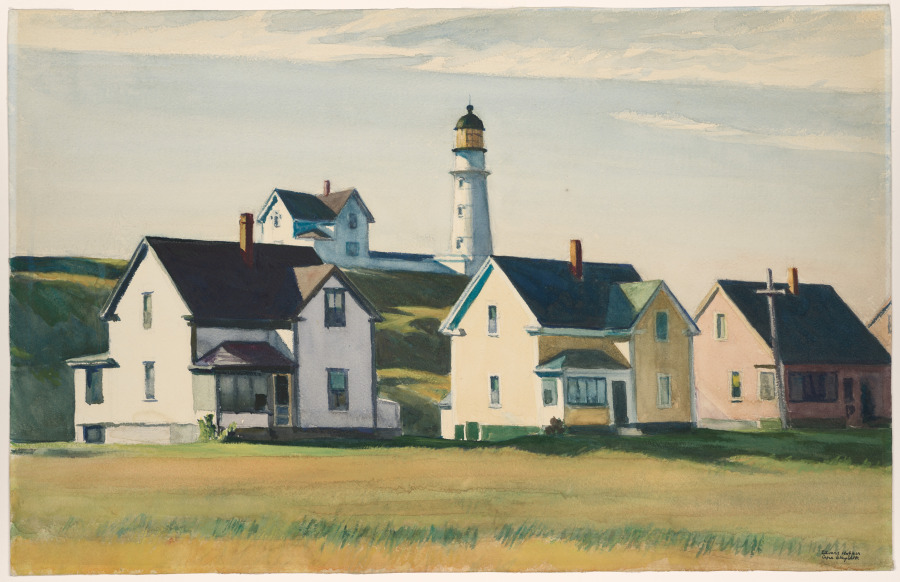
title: Lighthouse Village (also known as Cape Elizabeth)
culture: America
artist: Edward Hopper (American, 1882–1967)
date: 1929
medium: watercolor with gouache over graphite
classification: Drawing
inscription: signed, lower right, in black gouache: Edward Hopper / Cape Elizabeth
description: Edward Hopper made this watercolor during the last of several painting excursions that he took to Maine. He had painted the lighthouse at Cape Elizabeth once two years before, but found the structure so interesting that he returned to it in this drawing. Hopper was especially attracted to the varying green tones of the grass and the combination of buildings, each with a different purpose, including one where the lighthouse keepers slept and the three at the bottom where coast guard families lived. He used a slightly different tone of watercolor for each of the structures to accurately convey the reflection of light on them.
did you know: In an interview published in 1962, Edward Hopper described this watercolor's setting, saying that "I like Maine very much but it gets so cold in fall."